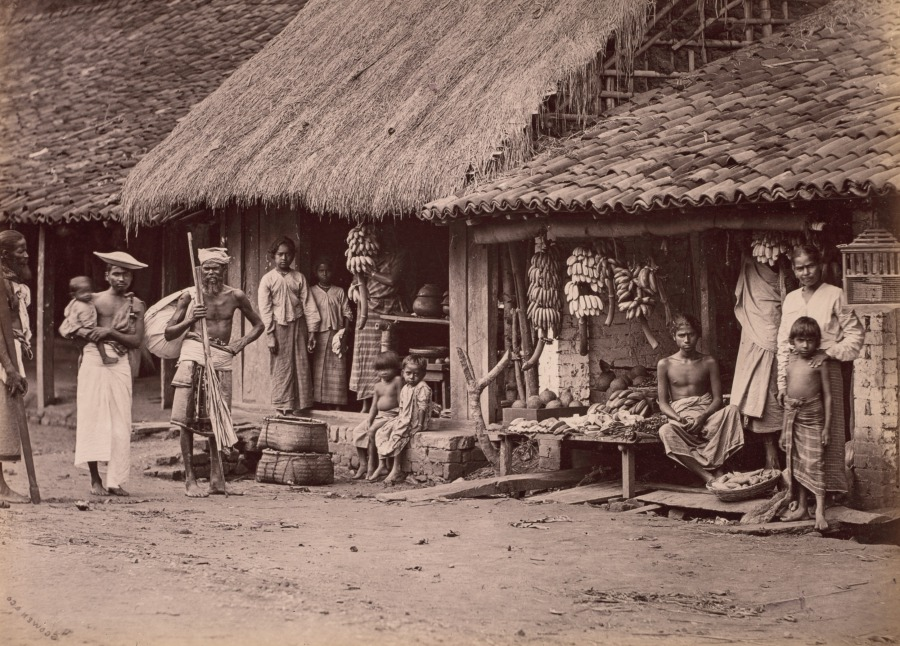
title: Fruitsellers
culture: India, 19th century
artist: Scowen & Co. (British, active Ceylon, 1876–1895)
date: c. 1880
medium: Albumen print from glass plate negative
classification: Photograph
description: Occupational scenes like Fruitsellers were popular subjects in 19th-century colonial photography. Like this image of fruit sellers in colonial Ceylon (now Sri Lanka), such images provided armchair travelers with insight into local life and customs, as seen through European eyes.